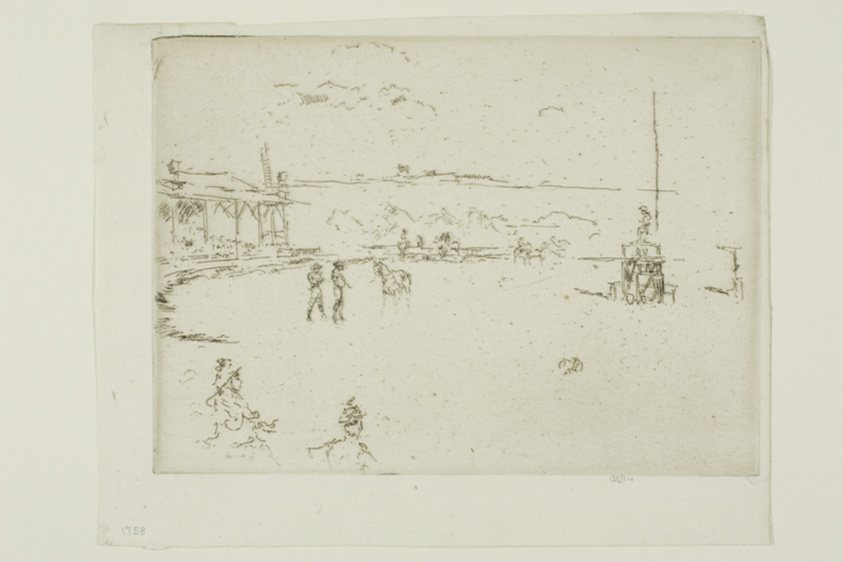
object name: Print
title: Wild West: The Orator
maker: James McNeill Whistler (American, 1834-1903)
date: 1887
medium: Etching with foul biting in black ink on cream laid paper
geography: United States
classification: etching; foul biting; print; prints and drawing; paper